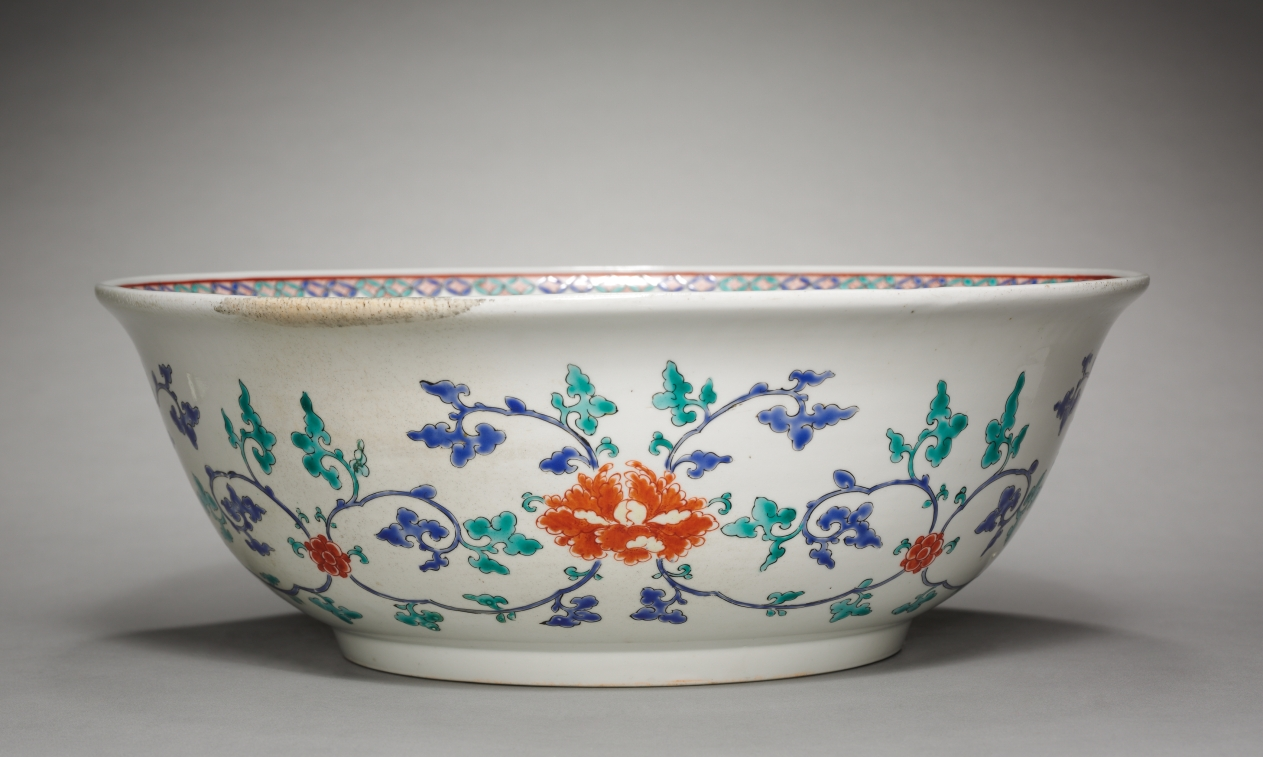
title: Bowl: Kakiemon Ware (1 of 2)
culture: Japan, Edo period (1615–1868)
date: late 1600s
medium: Imari ware porcelain with overglaze enamel and gold decoration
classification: Ceramic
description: The Chinese style of decoration identifies this bowl as a product made for the markets in England, Holland, France, and Germany. Here, kakiemon potters rearranged the Chinese literati motifs of the plum, pine, and bamboo. Such kakiemon ware inspired domestic porcelain production in Europe in the 1700s and 1800s.